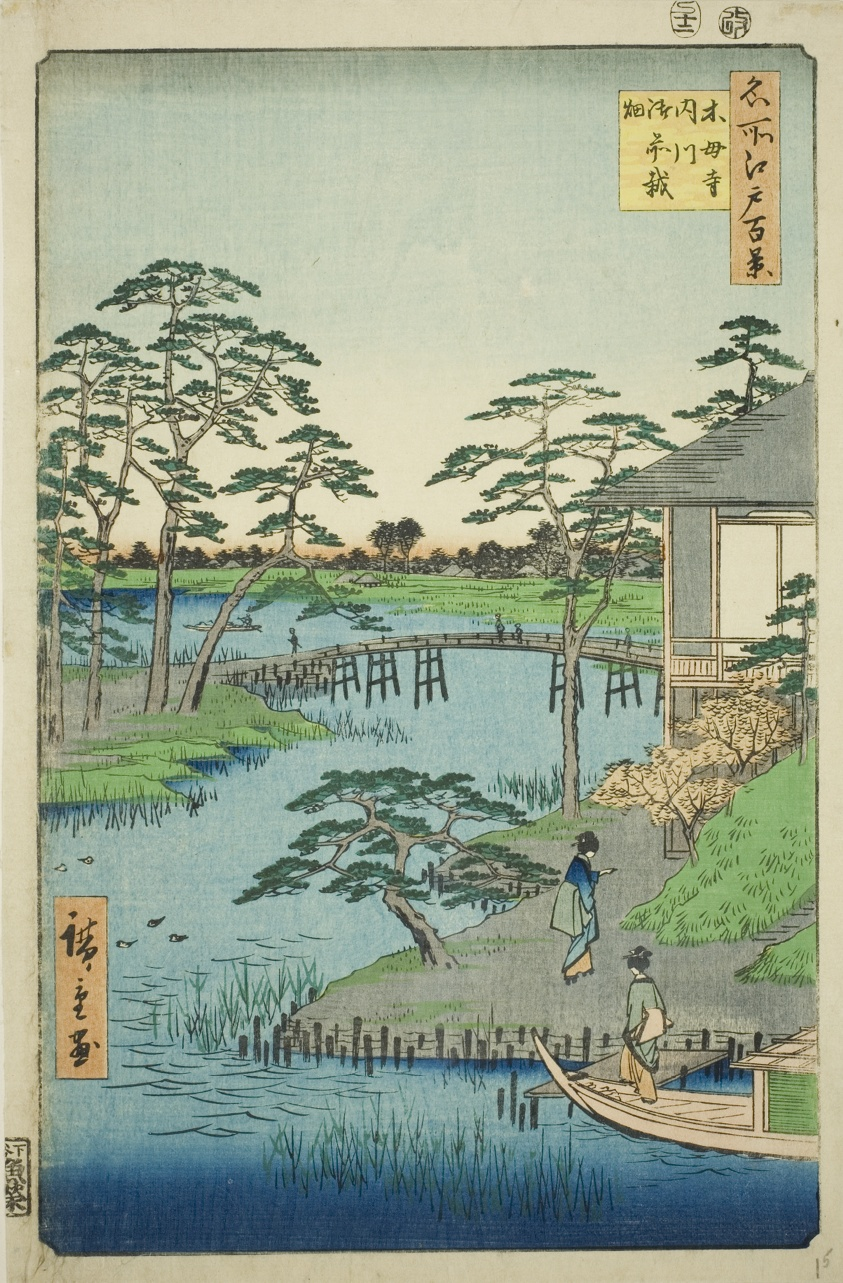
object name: Print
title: Mokubo Temple, Uchigawa Inlet, and Gozensaihata (Mokuboji Uchigawa Gozensaihata), from the series "One Hundred Famous Views of Edo (Meisho Edo hyakkei)"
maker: Utagawa Hiroshige 歌川 広重; Japanese, 1797-1858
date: 1857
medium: Color woodblock print; oban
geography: Japan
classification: woodblock print; print; asian art